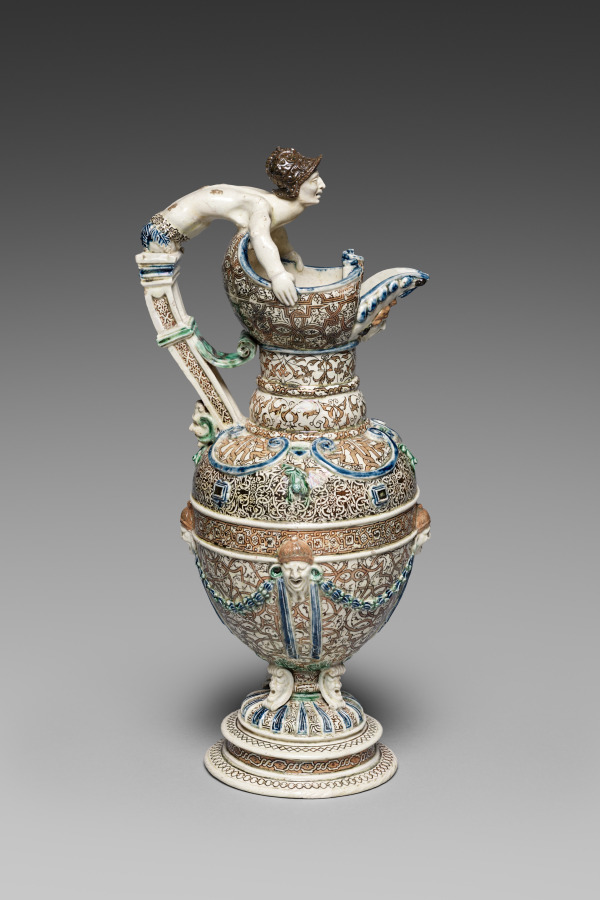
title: Ewer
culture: France, 16th century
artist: Saint-Porchaire (French)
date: c. 1540–67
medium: lead-glazed, white-paste earthenware with inlaid slip decoration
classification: Ceramic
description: An example of one of the most extravagant wares of this kind, this ewer is decorated with applied masks and frogs as well as a variety of stamped and inlaid designs. The shape and patterns reflect the metalwork of the time—the final period of this artistic pottery.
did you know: The green tree frog was one of the symbols of French King Henri II, indicating that this ewer may have either been made for the king or one of his courtiers.